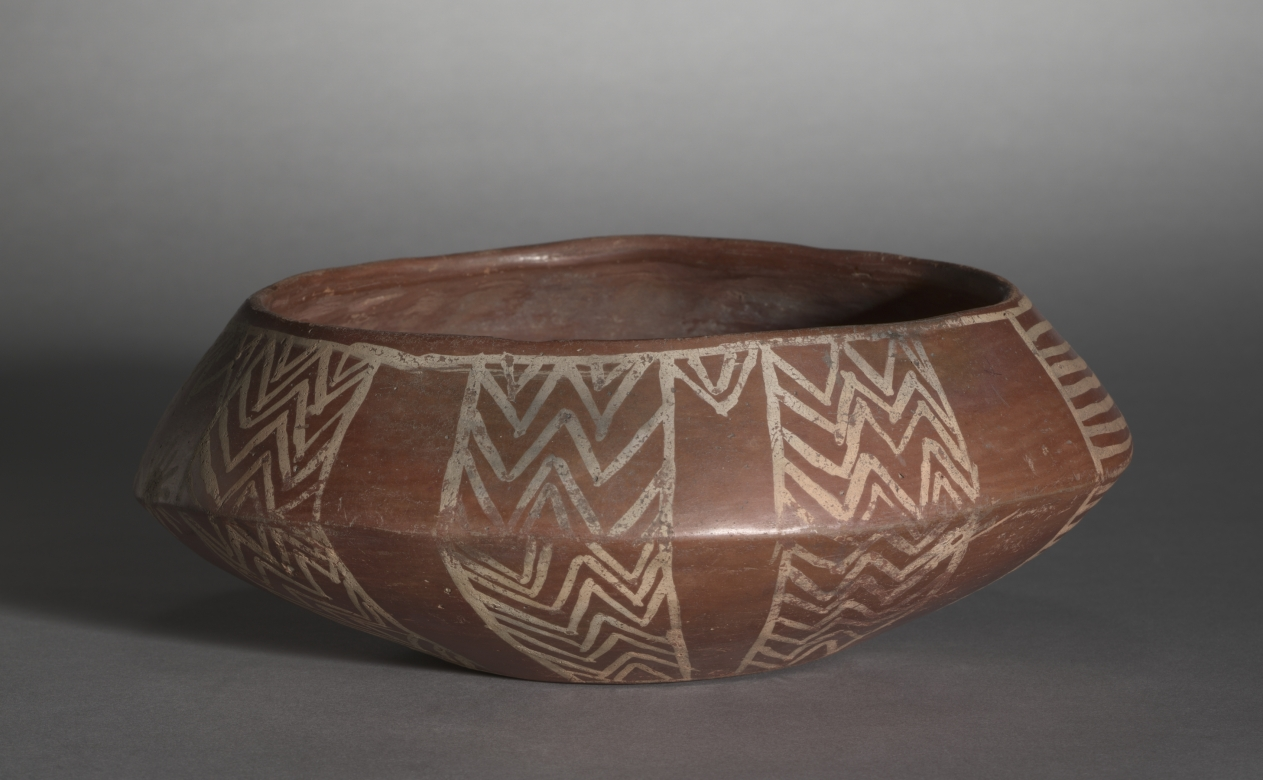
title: White Cross-Lined Bowl with Turtle and Sun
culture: Egypt, Predynastic (5000–2950 BCE), Naqada I–II (3900–3300 BCE)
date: c. 4000–3400 BCE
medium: Nile silt pottery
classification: Vessels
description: Red polished vessels with white painted decoration (known as white cross-lined ware or C-ware) represent Egypt’s oldest known tradition in painted pottery. The decoration on this bowl, painted after firing, features the sun on the side and a turtle on the bottom of the vessel. The turtle was considered the enemy of the Egyptian sun god Ra because it preferred the murky river bottom to the sunlight.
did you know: This bowl was built by hand from coils, then smoothed and burnished.